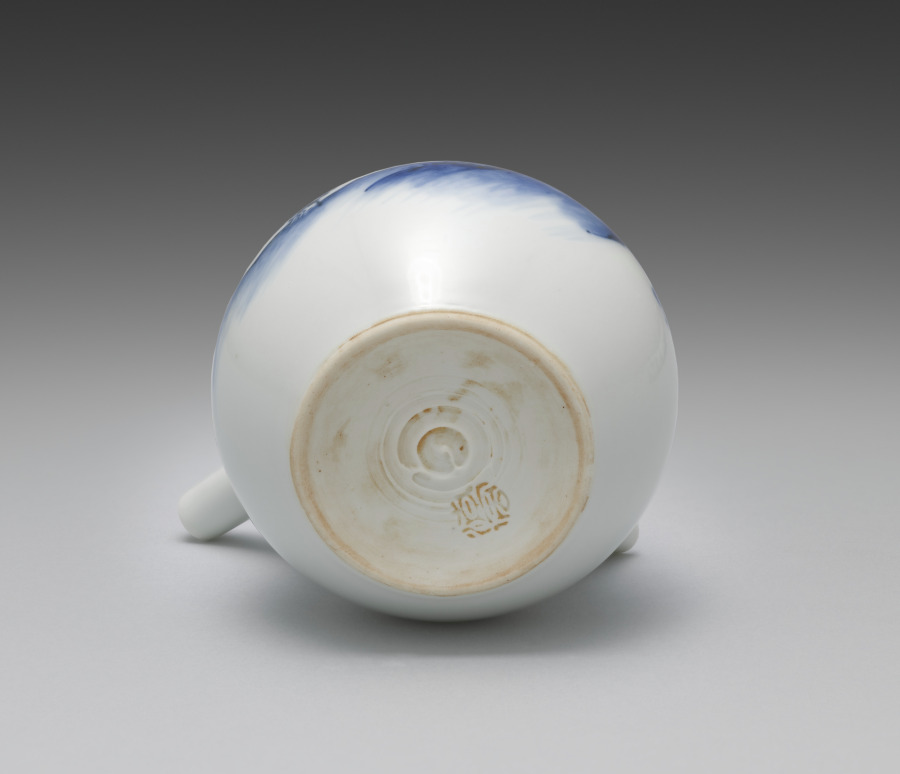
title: Teapot from Tea Set with Chinese Landscape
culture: Japan, Meiji period (1868–1912)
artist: Seifū Yohei III (Japanese, 1851–1914)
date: 1893–1914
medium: Porcelain with underglaze blue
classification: Ceramic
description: This tea set with idyllic lakeside Chinese landscapes has a side-handled pot called a kyūsu, used for steeping, straining, and serving tea. Unlike some others, this set also has a yuzamashi, a container used to cool boiled water to just the right temperature for the best flavor when steeping. Seifū Yohei III’s painting teacher, Tanomura Chokunyū (1814–1907), made a visual record of famous sencha events that shows how these kinds of porcelains fit with objects such as a stove and kettle to form a complete set of utensils for tea preparation, and with ensembles of decorative objects meant to inspire creativity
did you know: The side-handled pot is called a kyūsu, used for steeping, straining, and serving tea.